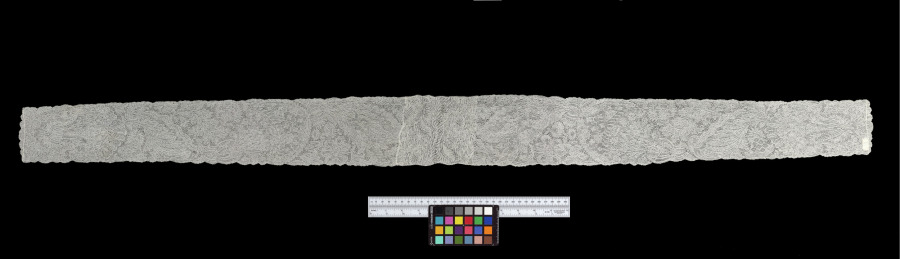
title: Lace Lappet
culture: Belgium, Binche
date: 1700s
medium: Linen: bobbin lace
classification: Lace